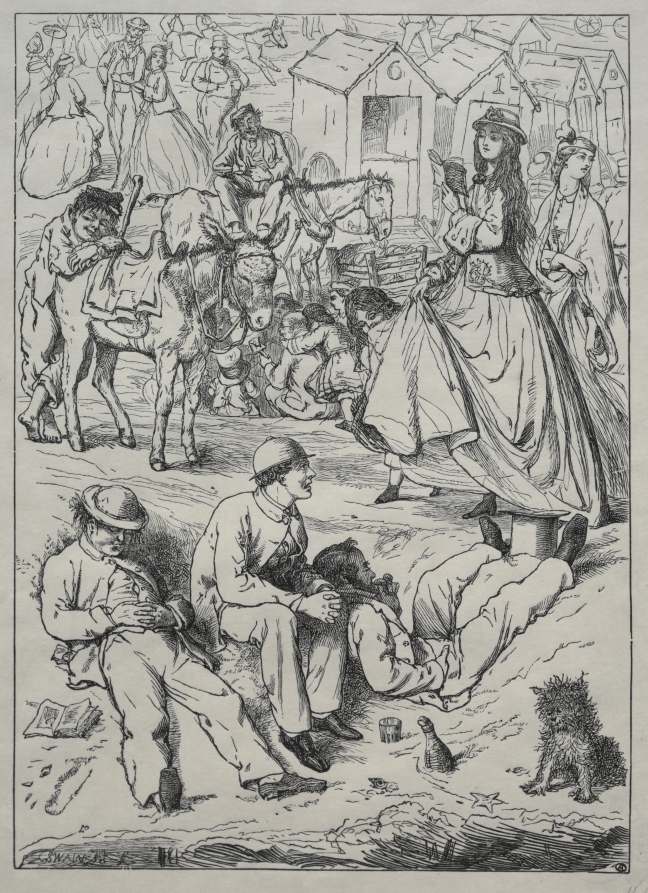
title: What We Did at the Seaside - Nothing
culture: England, 19th century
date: 1862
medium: wood engraving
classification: Print